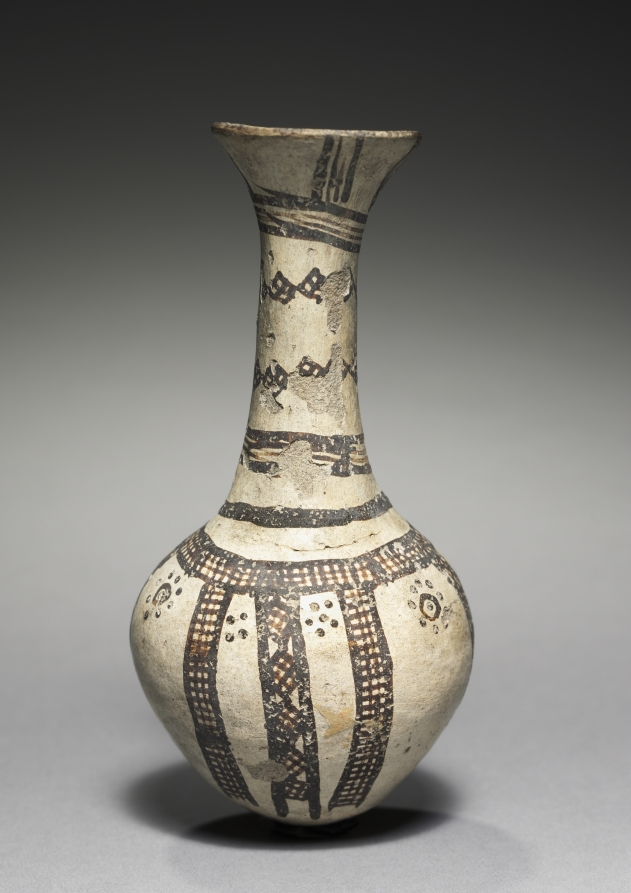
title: Jug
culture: Cyprus, late Cypriot II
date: c. 1450–1200 BCE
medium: white slip ware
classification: Ceramic